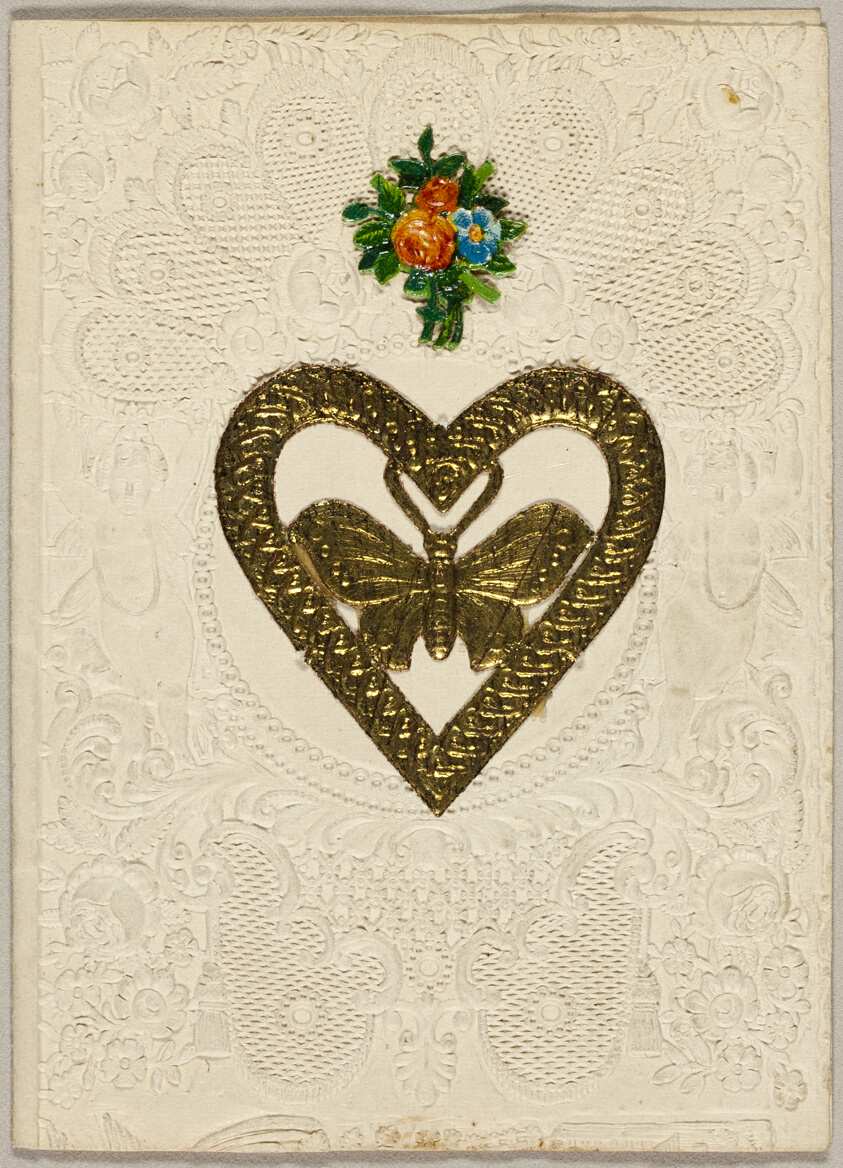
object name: Drawing and Watercolor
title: Untitled Valentine (Butterfly in Heart)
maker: Unknown Artist; American or English, 19th century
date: 1850/60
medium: Collaged elements on embossed ivory wove paper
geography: United States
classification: collage; valentine; prints and drawing; paper